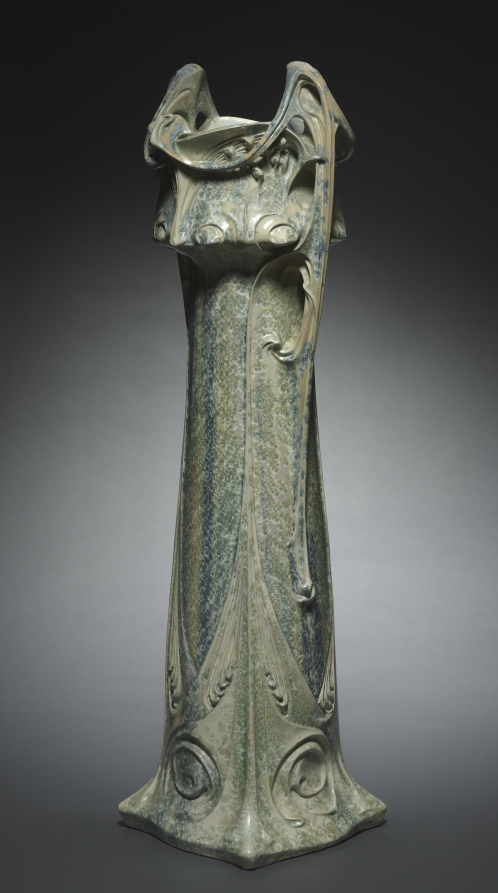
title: Vase des Binelles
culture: France, Sèvres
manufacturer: Sèvres Porcelain Factory (French, est. 1756)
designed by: Hector Guimard (French, 1867–1942)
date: 1903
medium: stoneware with crystalline glaze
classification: Ceramic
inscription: Gres 1903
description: In 1899, French architect Hector Guimard designed the Castle Henriette, built on Rue des Binelles in Sèvres, a suburb of Paris, France. This stoneware vase is named for the street and bears similarities to architectural features of Castle Henriette. The vase’s asymmetrical and curvilinear design showcases the trademarks of the Art Nouveau style. Five examples of the Vase des Binelles were made by the still-operating Sèvres Manufactory, whose ceramics were celebrated for their innovative decoration and design since its establishment in the mid-1700s.